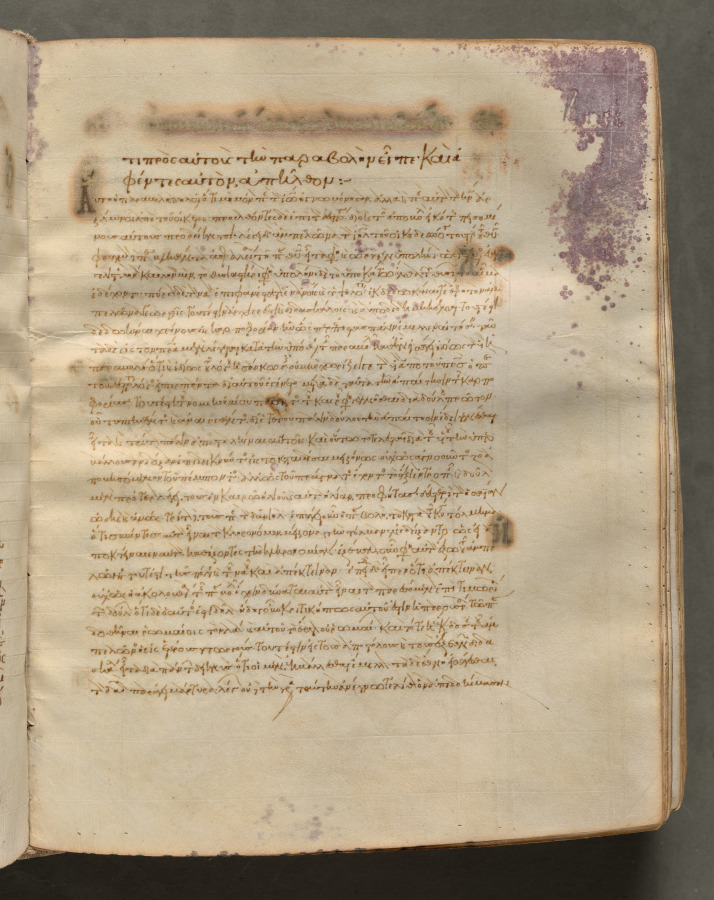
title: Text, folio 177 (recto), from a Gospel Book with Commentaries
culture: Byzantium, Constantinople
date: c. 1000–1100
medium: ink, tempera, and gold on vellum; leather binding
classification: Bound Volume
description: Each of the four gospels in this book opens on a page with brilliantly illuminated borders depicting the author of the text as well as birds-principally peacocks, symbols of the immortality of the soul-and fountains, representing the fountain of life and the salvation of the soul. This volume consists of 428 leaves with texts in Greek. Its level of sophistication suggests that it was probably written and decorated in a monastery in Constantinople.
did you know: Gospel Books were carried in procession through Byzantine churches.